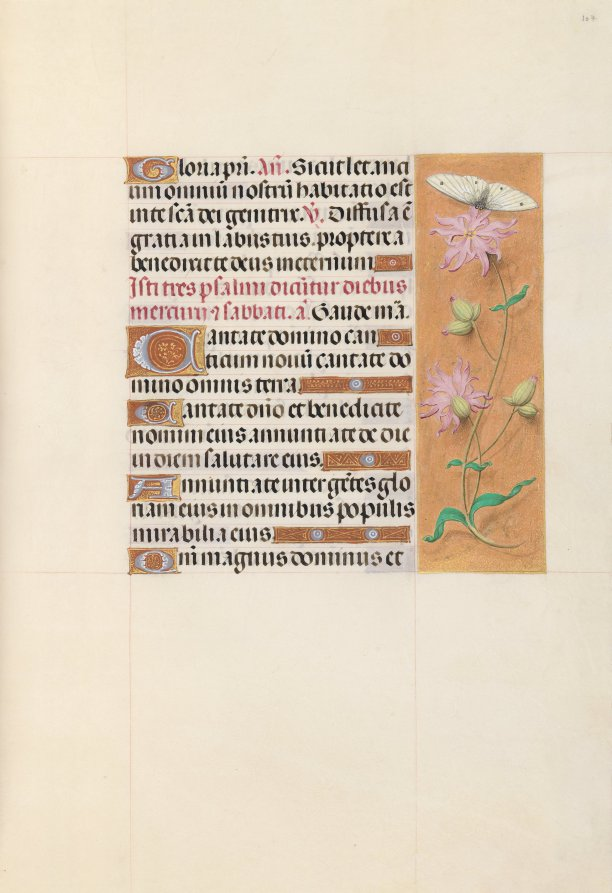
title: Hours of Queen Isabella the Catholic, Queen of Spain: Fol. 107r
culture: Flanders, Ghent and Bruges, late 15th century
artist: Master of the First Prayerbook of Maximillian (Flemish, c. 1444–1519)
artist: and Associates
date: c. 1500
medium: ink, tempera, and gold on vellum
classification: Bound Volume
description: This manuscript was illuminated by a circle of at least five highly organized manuscript painters active in the Flemish cities of Ghent and Bruges. The principal illuminator was Alexander Bening, who painted the majority of the book's miniatures. Manuscripts produced by this circle of artists are renowned for the decoration of their borders, which typically feature a rich variety of realistically-painted flowers, birds, and butterflies. This prayer book, called a book of hours, was intended not for a cleric, but for the private devotions of a lay person-in this case, Isabella the Catholic, Queen of Spain (1451-1504). Isabella's coat of arms embellishes the book's frontispiece. It is unlikely that the book was commissioned by the Queen herself; rather, she probably received it as a diplomatic gift from someone courting her patronage, perhaps Cardinal Francisco Jimenez de Cisneros. A Franciscan friar, Jimenez was dependent upon Isabella for his advancement, first to the post of Queen's confessor in 1492, and then to Archbishop of Toledo in 1495.